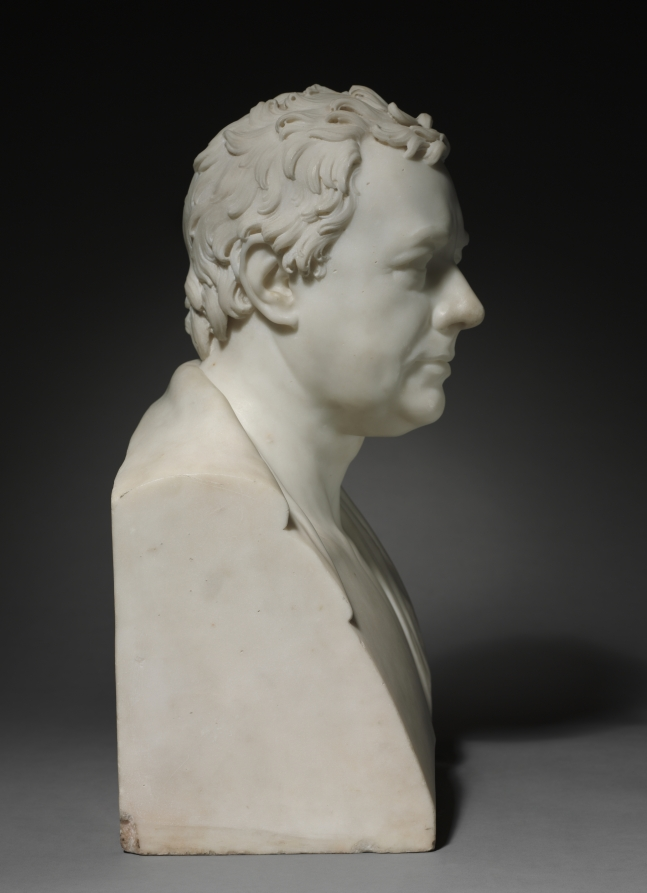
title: Sir H. C. Englefield, Bart.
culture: England, 19th century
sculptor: Francis Legatt Chantrey (British, 1781–1841)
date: 1818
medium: marble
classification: Sculpture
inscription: inscribed left side: Chantrey/Sculptor/1818; rear: Sir H. C. Englefield, Bart.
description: To modern eyes, a bare-chested portrait of a man in his mid-60s might seem undignified. However, it was fashionable for gentlemen of Englefield’s generation to be portrayed in this manner, deliberately referencing the antique sculptures of Roman statesmen they admired. As a Catholic, Englefield was barred from taking part in politics in England; however, he was a member of several clubs devoted to the amateur study of art, science, and history. Among these were the Society of Dilettanti, which championed the works of antiquity and promoted the creation of modern art in the same spirit—like this marble bust by celebrated sculptor Francis Legatt Chantrey.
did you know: Initially, Chantrey tried to establish himself as a portrait painter. After 1805, he painted only on occasion and from 1811–20, he became the leading portrait sculptor in Regency Era Great Britain.